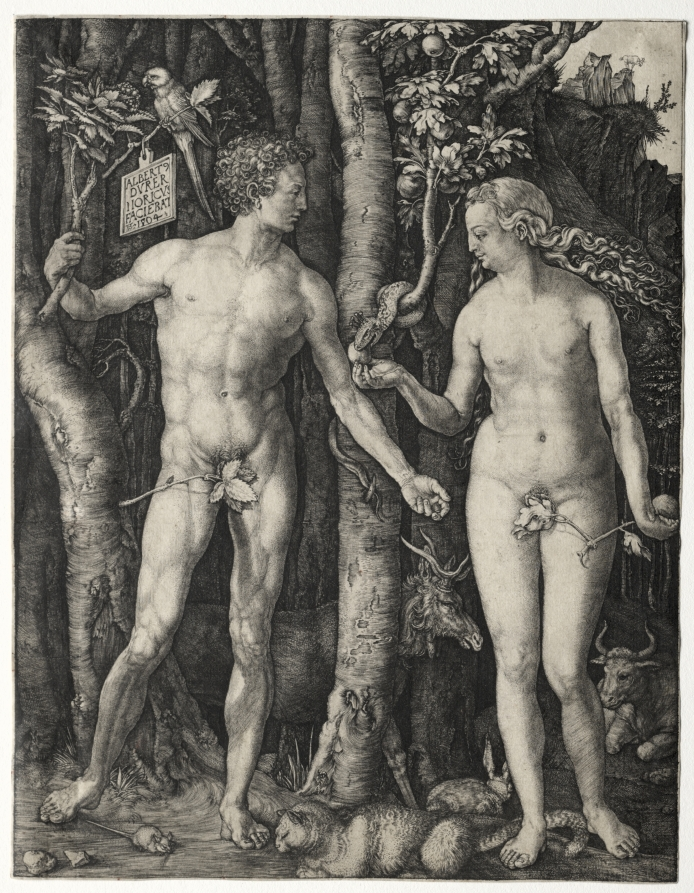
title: Adam and Eve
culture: Germany, early 16th Century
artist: Albrecht Dürer (German, 1471–1528)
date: 1504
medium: engraving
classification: Print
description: Dürer based Adam’s pose on the Apollo Belvedere, a Roman sculpture discovered in Italy during the late 1400s. He constructed the idealized bodies of Adam and Eve using geometry and a mathematical system of proportion loosely derived from ancient models. For Dürer, who mostly depicted Christian subjects, the creation of theoretically perfect human bodies was a pathway to comprehending the divine. He thus represented Adam and Eve as he understood them in both theological and artistic terms: moments before tasting the forbidden fruit, they are still uncorrupted by sin and death, existing in a state of faultless beauty.